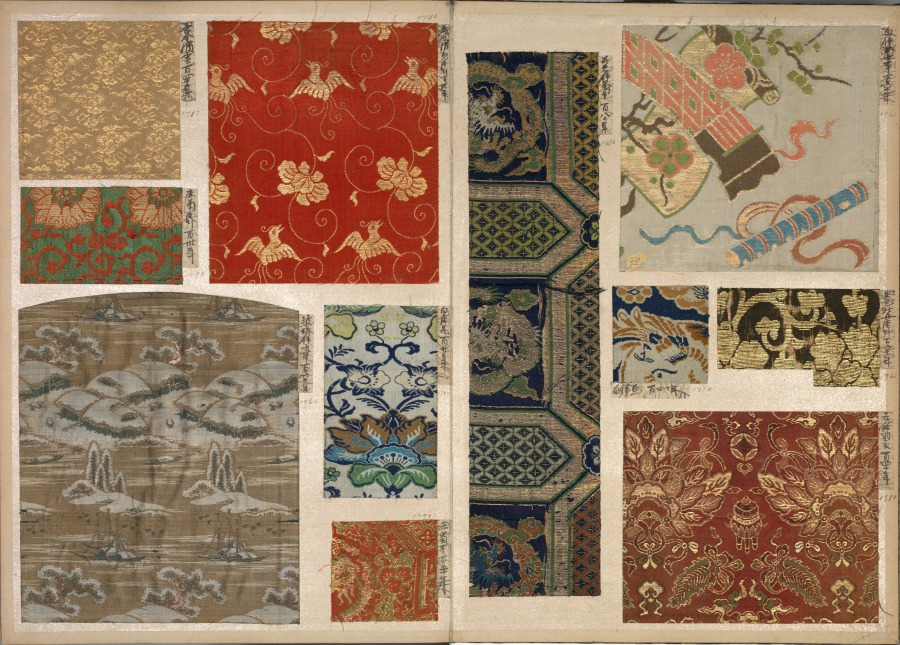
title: Album of Textile Samples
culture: Japan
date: 1790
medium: silk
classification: Textile